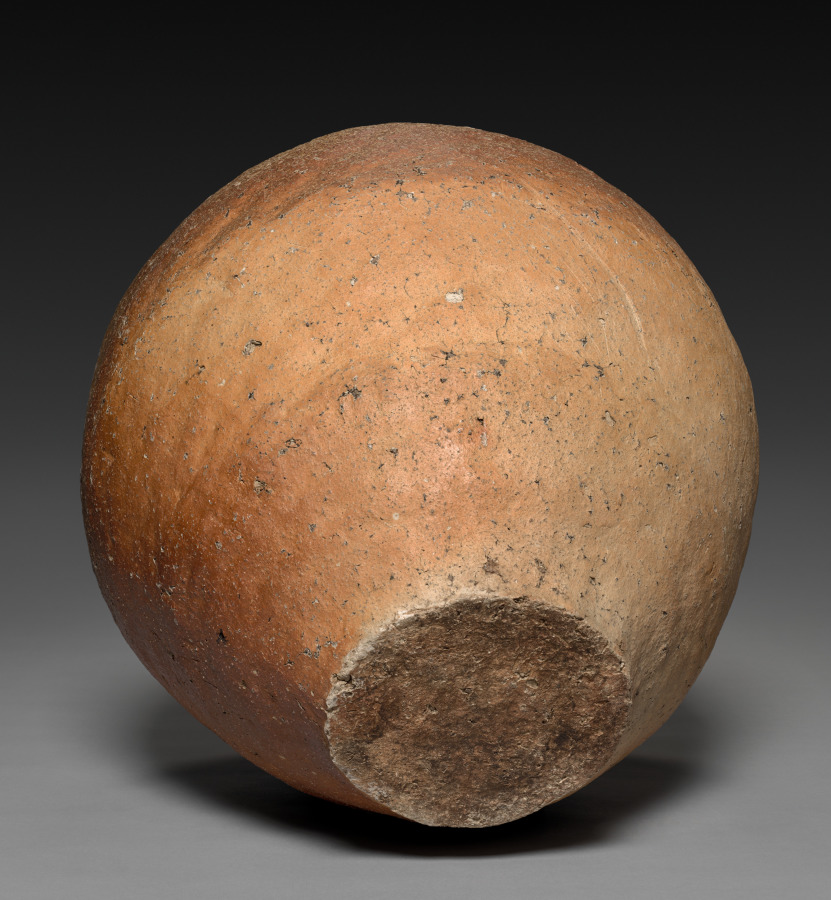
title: Storage Jar (Tsubo)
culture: Japan, Muromachi period (1392–1573)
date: 1400s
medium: stoneware with natural ash glaze (Shigaraki ware)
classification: Ceramic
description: This bulbous clay jar, with its expansive, dry orange-brown surface, white dots of feldspathic stone, and spidery crazing marks epitomizes one type of medieval ware from Shigaraki. This region east of Kyoto and north of the older cultural and religious center of Nara has long been known as a source of superior clay material. Shigaraki storage jars were crafted for strength and durability. The vessel's slightly lopsided shape shows precisely where its three lower clay sections connect with one another. The "stubble" on the upper shoulder sections is highlighted by dripping rivulets of dull-green ash glaze in one small area on the broken neck. The same natural glaze runs over the slope of the shoulder and also appears as a large splash of thin, glossy olive green where the shoulder joins the upper body.